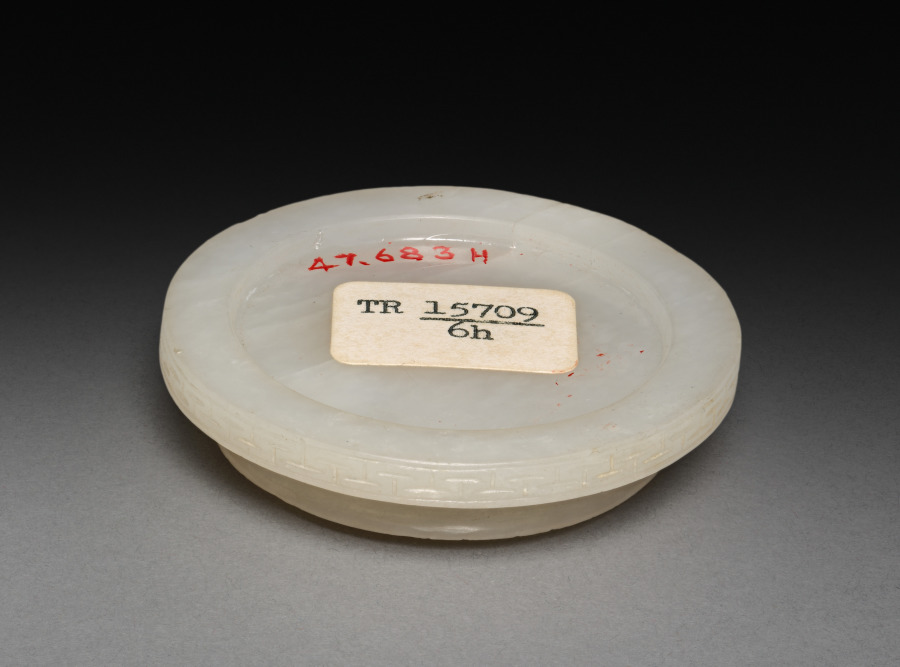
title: Three-Sectional Altar Group: Small Bowl with Carved Dragon (upper section of base)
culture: China, Qing dynasty (1644-1911)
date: Qing Dynasty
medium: jade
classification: Jade